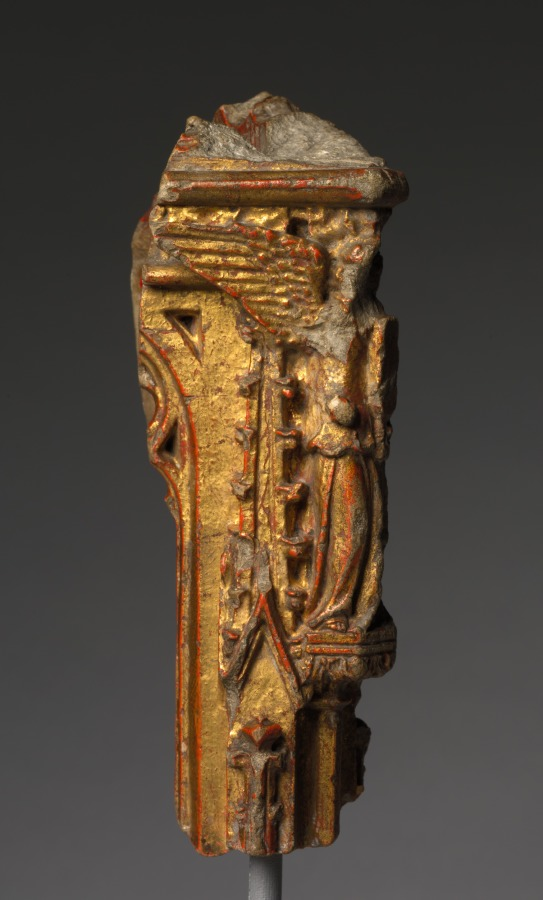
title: Fragment of an Architectural Canopy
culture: France, early 15th century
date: early 1400s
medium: limestone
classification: Sculpture